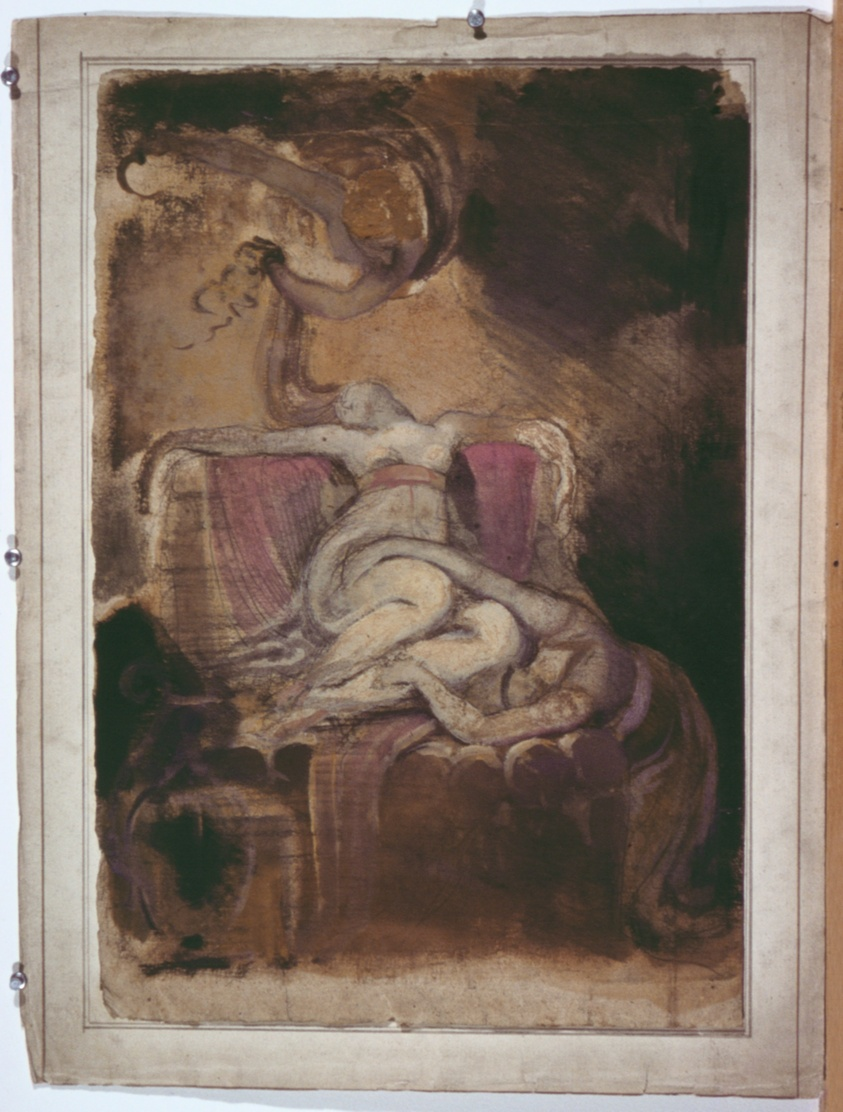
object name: Drawing and Watercolor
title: Sketch for 'Dido on the Funeral Pyre' (recto); Erotic Sketch of Man and Woman (verso)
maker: Henry Fuseli (Swiss, active in England, 1741-1825)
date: c. 1781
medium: Oil paint over charcoal (recto), and black chalk (verso), on ivory laid paper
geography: England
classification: oil on paper; drawings (visual works); prints and drawing; paper